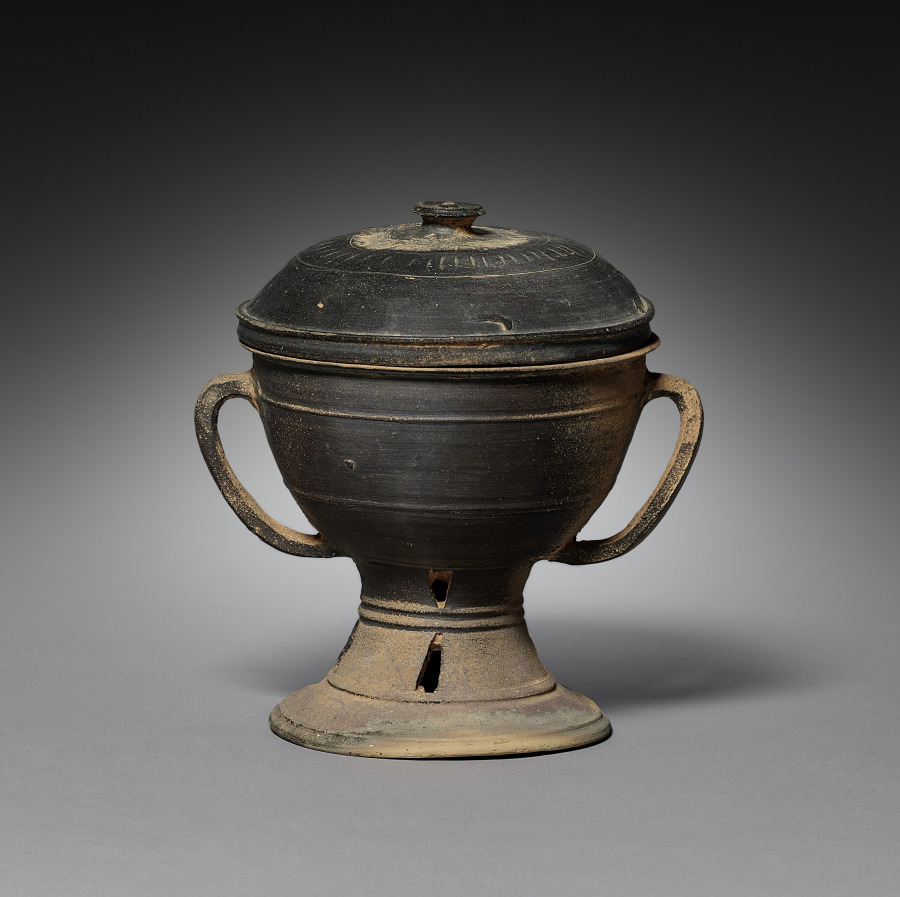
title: Lidded Cup with Strap Handles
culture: Korea, Gaya period (42–562 CE)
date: 300s–400s CE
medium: stoneware with natural ash glaze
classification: Ceramic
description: Pottery vessels with a footed stand such as this one is the earliest known high-fired ware. Its gray color is the result of the reduction of oxygen in the closed kiln chamber. Footed vessels were not for everyday usage, but rather served to present offerings to the deceased.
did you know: A series of triangular cutouts shown on the bottom are standard features of Kaya pottery.